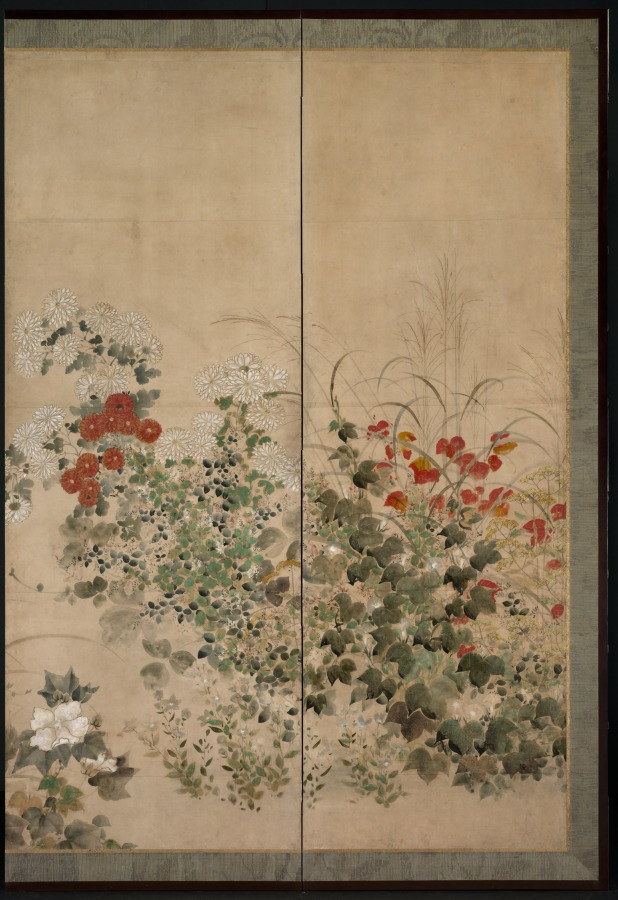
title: Flowers and Grasses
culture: Japan, Edo period (1615–1868)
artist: Kitagawa Sōsetsu (Japanese, active 1639–50)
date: mid-1600s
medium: pair of six-fold screens, ink and color on paper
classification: Painting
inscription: two seals, lower left: "I-nen; Sosetsu"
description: Kitagawa Sōsetsu painted for the Maeda family, powerful rulers of what is present-day Ishikawa Prefecture on the central northern coast of Honshū, Japan’s main island. Screens served as room dividers and backdrops in Maeda grand residences. This composition is considered one of the artist’s masterpieces. Kitagawa Sōsetsu is thought to have been a student of Tawaraya Sōsetsu, who was in turn the student of Tawaraya Sōtatsu, the Kyoto-based master painter regarded as the creator of the style that came to be known as Rinpa. By selecting a painter of this lineage, the Maeda family consciously connected their aesthetics to those of the imperial capital as a means of proclaiming their elevated status.